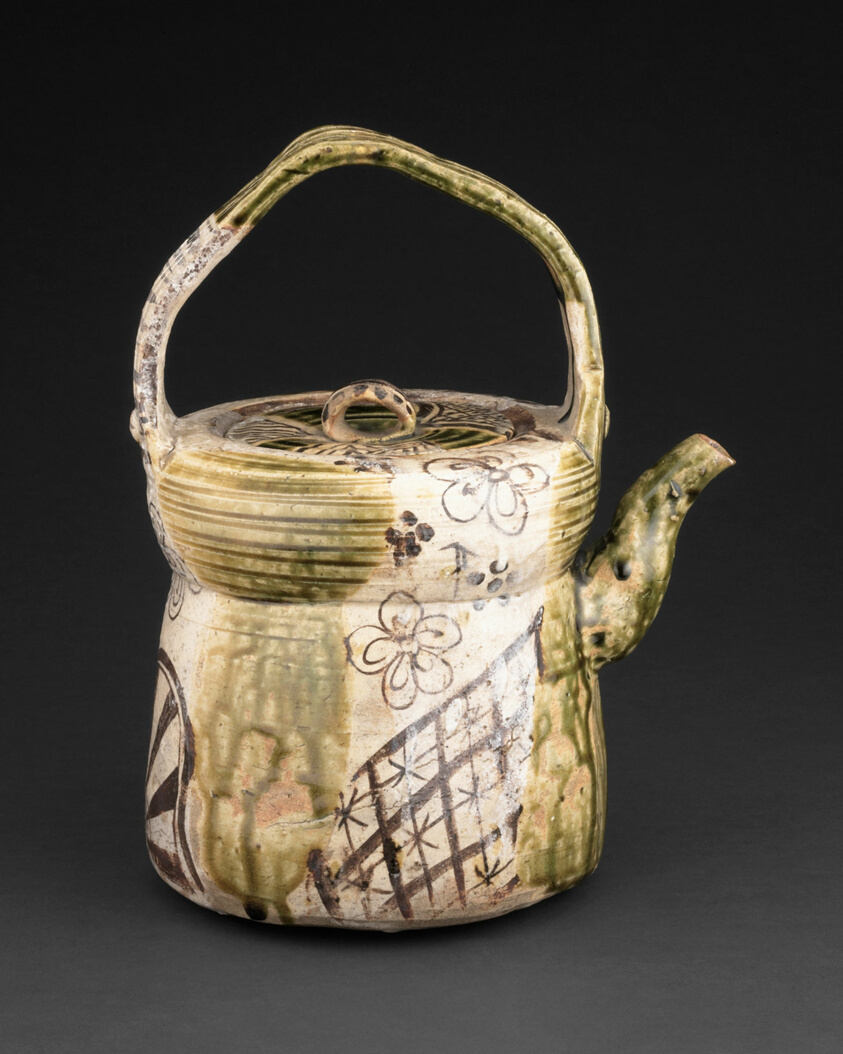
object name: Decorative Arts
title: Oribe-Type Ewer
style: Japanese (culture or style)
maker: Japan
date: early 17th century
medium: Glazed stoneware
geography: Japan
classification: ewer (vessel); stoneware; vessel; asian art; ceramics; decorative arts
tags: tea, flowers